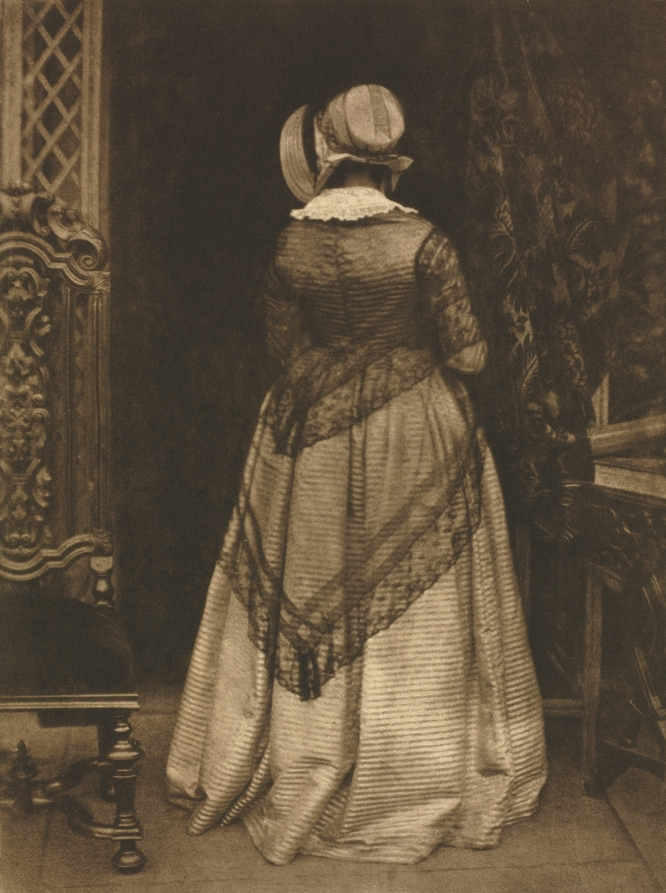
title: Camera Work: Lady Ruthven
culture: England, 20th century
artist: David Octavius Hill (British, 1802–1870)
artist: and Robert Adamson (British, 1821–1848)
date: 1905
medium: photogravure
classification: Bound Volume